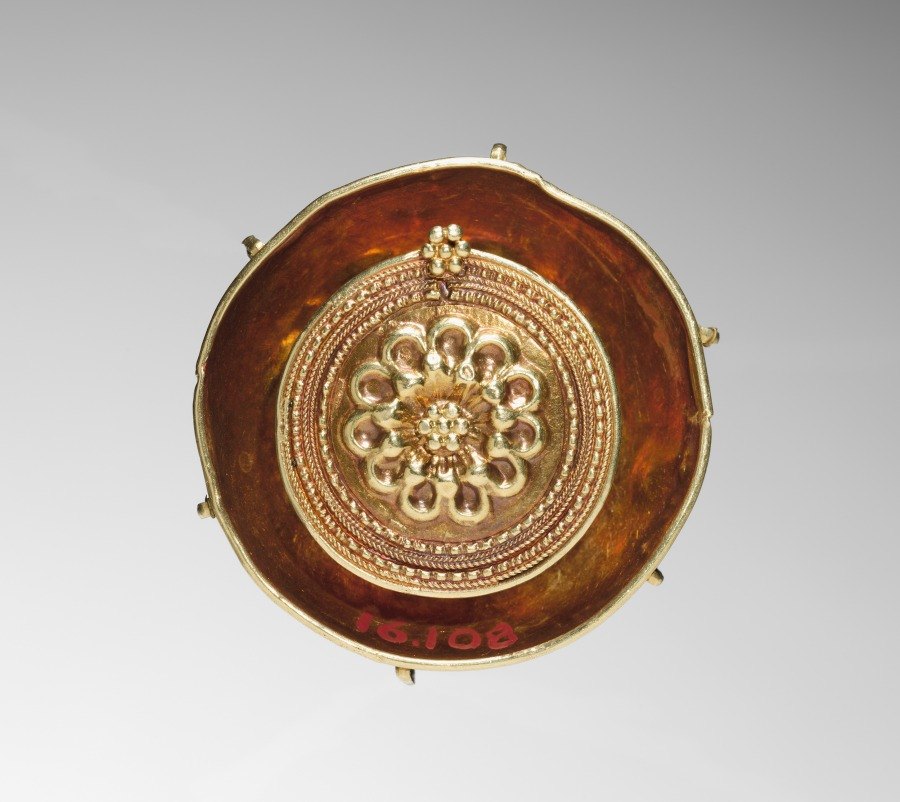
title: Ear Plug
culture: India, Bengal (?)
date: 1800s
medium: gold with emeralds and rubies, and a topaz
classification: Jewelry